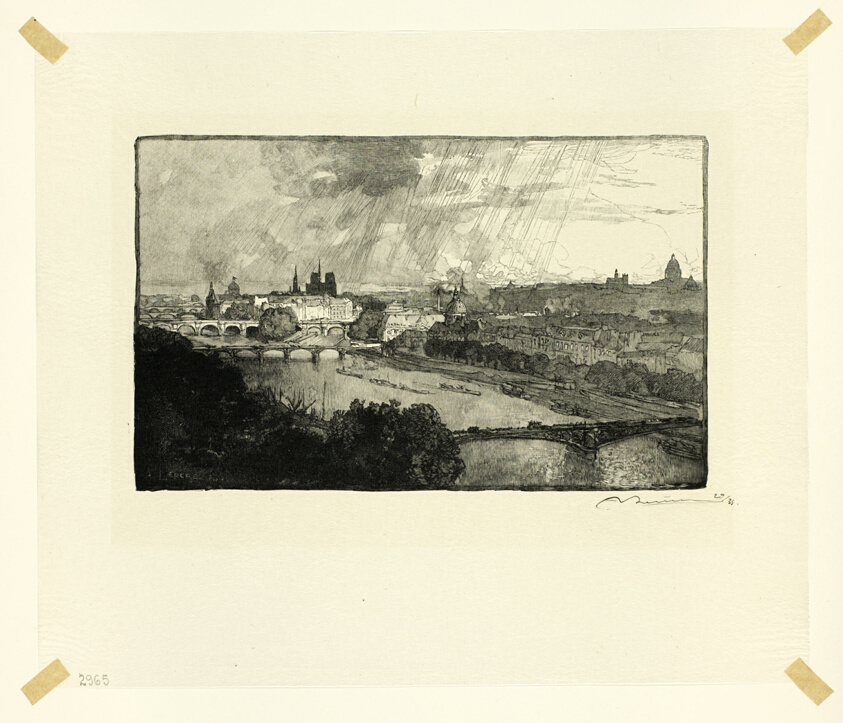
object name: Print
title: Paris, Viewed from the Pavillon de Flore, plate eleven from Le Long de la Seine et des Boulevards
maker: Louis Auguste Lepère (French, 1849-1918); published by A. Desmoulins (French, active c. 1908-1910)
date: 1890, published 1910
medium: Wood engraving in black on cream Japanese tissue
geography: France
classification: wood engraving; print; prints and drawing